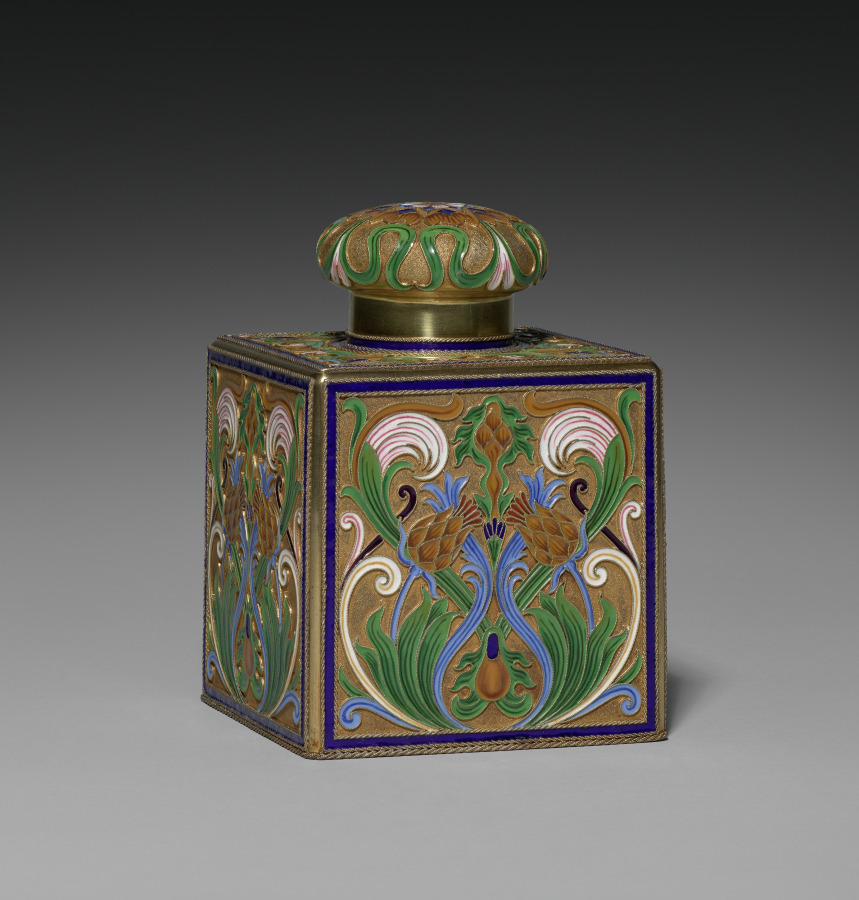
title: Covered Tea Caddy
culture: Russia, St. Petersburg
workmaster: attributed to Feodor Ivanovich Rückert (Russian, 1840–1917)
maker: House of Fabergé (Russian, 1842–1918)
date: 1896–1906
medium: silver gilt, opaque cloisonné enamel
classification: Miscellaneous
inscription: 88, Kokoshnik, tester's initials [assay mark for Moscow, 1899-1908]; C. Fabergé (in Cyrillic); double-headed eagle [imperial warrant]; 88.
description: Fabergé’s craftsmen in Moscow, especially under the watchful eye of workmaster Feodor Rückert, became known for their work in the pan-Slavic or neo-Russian style, hearkening back to 17th-century motifs of Russian folk art. Often on rather conventional shapes, Rückert and his silversmiths created an explosion of color, achieved through the historic technique of cloisonné enamel in which tiny metal lines are soldered to the surface then filled with glass powders in various colors and fired to create a high gloss finish. The result is a spectacular evocation of the 17th-century originals. Far from mere copies, however, Rückert's designs, such as this tea service, employ naturalistic or abstract motifs in a thoroughly modern adaptation of a remarkable earlier period of Russian art and decoration.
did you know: This covered tea caddy is part of a larger tea service.